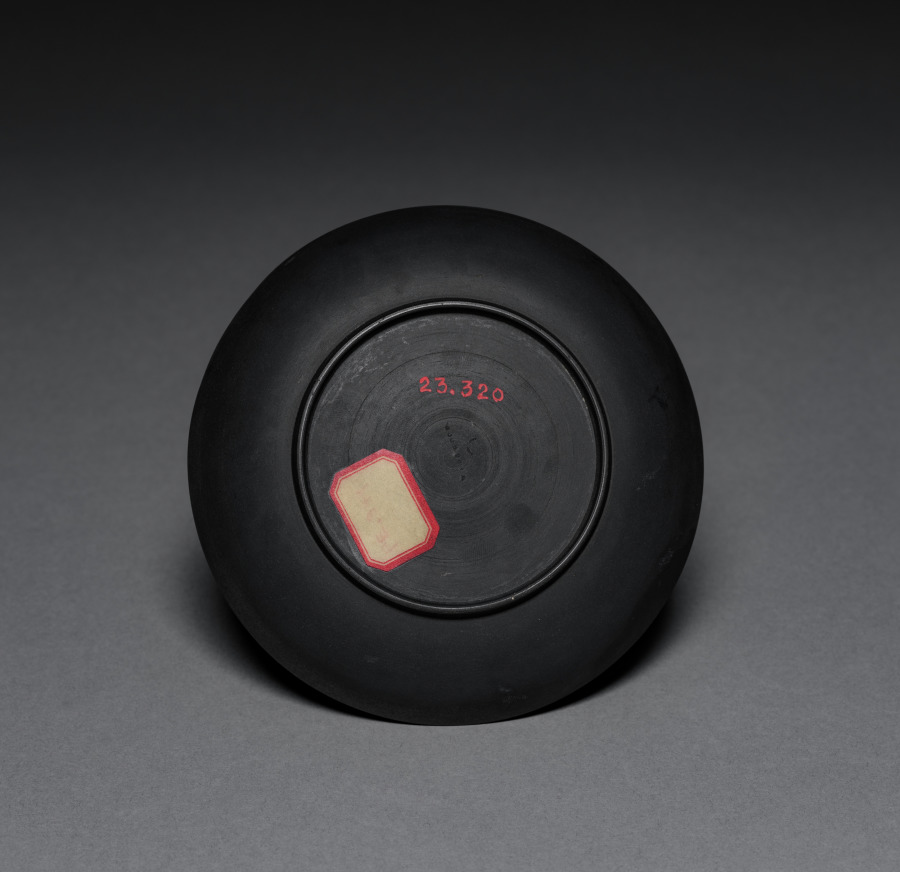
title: Saucer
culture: England, Staffordshire, late 18th century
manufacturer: Wedgwood Factory (British)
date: late 1700s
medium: pottery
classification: Ceramic